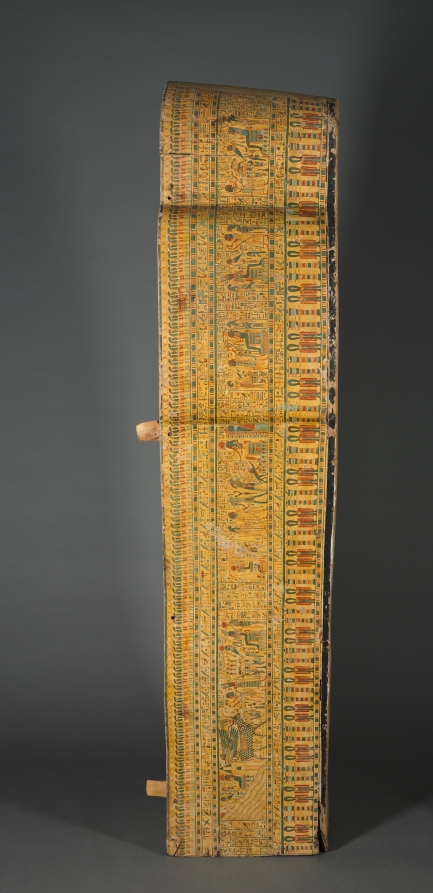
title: Coffin of Bakenmut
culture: Egypt, Thebes, Third Intermediate (1069–715 BCE), Dynasties 21–22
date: c. 1000–900 BCE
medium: gessoed and painted sycamore fig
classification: Funerary Equipment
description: The coffin of Bakenmut is one of the finest examples of painted wooden coffins made for the priests of Amen and their families at Thebes during Dynasty 21 and early Dynasty 22. The pharaohs of this time were no longer buried in the Valley of the Kings, but instead built tombs in the Delta, far to the north, where they resided. Security was lax in the Theban necropolis. The coffins and funerary goods of the wealthy citizens of Thebes were placed in unmarked and undecorated family tombs cut into the cliffs on the west bank of the Nile. All the care and detail that in more prosperous times were devoted to the decoration of the tomb chapel were now lavished on the elaborately painted coffins. Every available surface is crowded with religious scenes, images of funerary gods and goddesses, protective spells, and magical symbols. The deceased appears mummiform. An elaborate floral collar entirely covers the upper body, exposing only the separately attached hands (now lost). A pair of red "mummy braces" are crossed over the chest, their point of intersection marked by a winged sun disk. The lower body is covered with tiny figures modeled in gesso against a yellow background, which gives the effect of gold inlaid with glass or semiprecious stone. The decoration on the interior features two deified dead kings of Dynasty 18. Although these rulers had lived centuries before, memory of their greatness was still very much alive. The main scene near the top depicts Tuthmosis III, the great military pharaoh, who lived 500 years before Bakenmut. Posed as a mummy, the ruler wears a brilliant feathered garment enfolding him with falcon’s wings. The scene below features back-to-back seated images of Amenhotep I, regarded as the patron of the Theban cemetery and worshiped as a local god there.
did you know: Originally another smaller coffin was placed inside this outer coffin and in that the deceased with a mummy board would have rested.